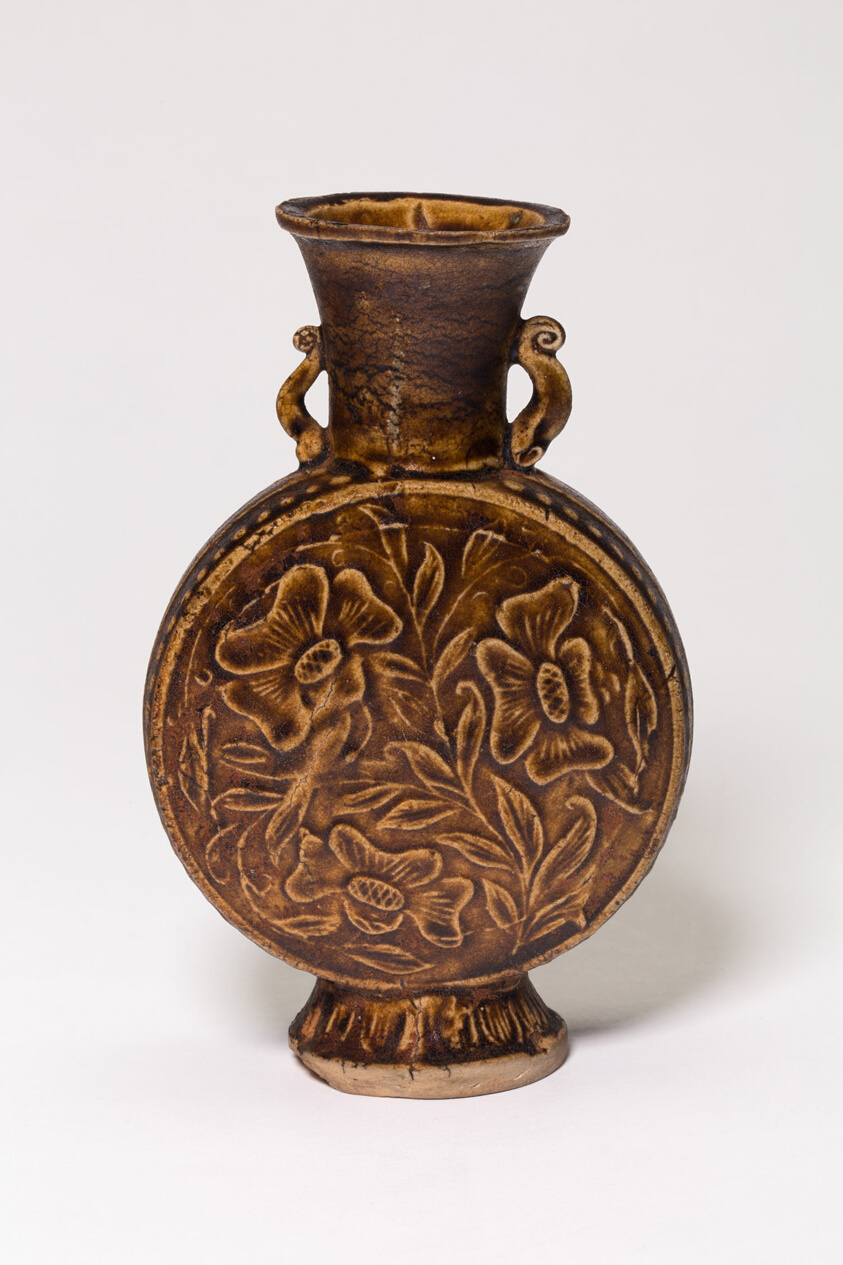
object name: Vessel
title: Amphora-Type Vase with Stylized Flowers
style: Chinese (culture or style)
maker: China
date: Jin dynasty (1115–1234), probably late 12th/13th century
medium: Glazed stoneware with underglaze molded decoration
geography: China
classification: vase; stoneware; vessel; asian art; ceramics